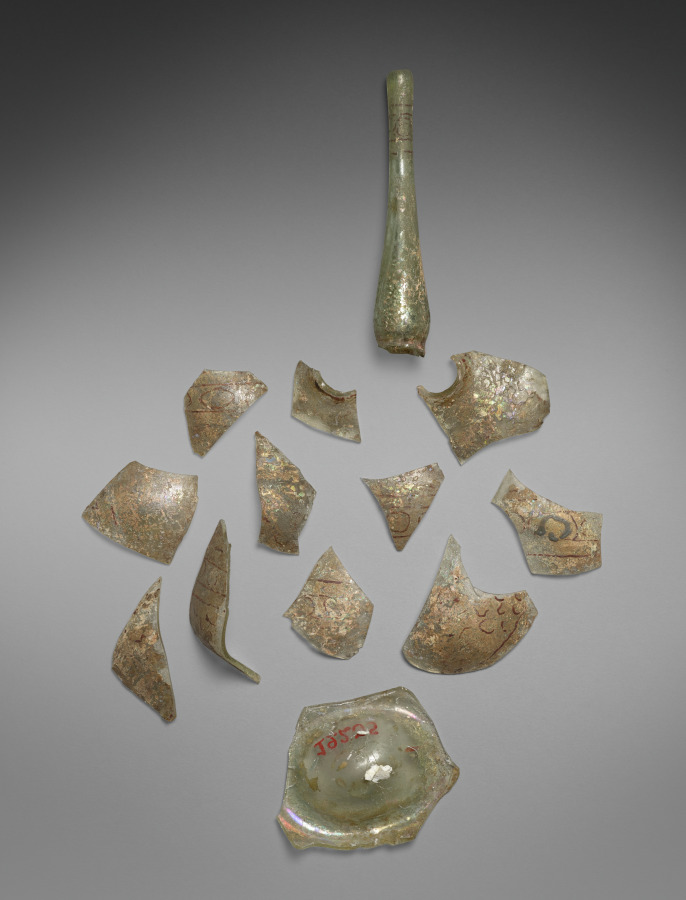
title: Flask or Sprinkler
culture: Syria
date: 1200s–1300s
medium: glass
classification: Jewelry